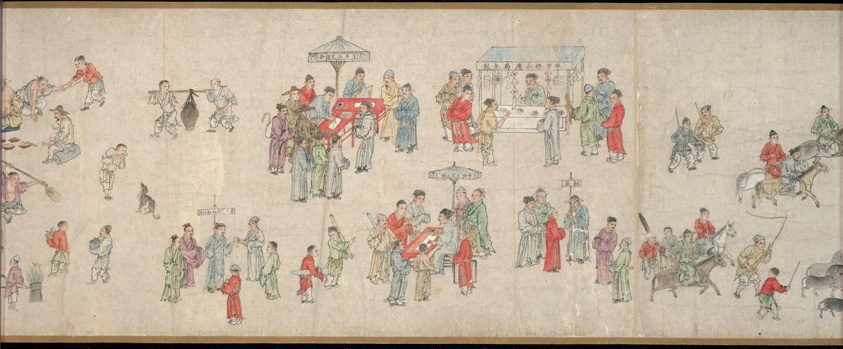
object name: Painting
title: Street Scenes in Times of Peace 太平風會圖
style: Chinese (culture or style)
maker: Zhu Yu (Zhu Junbi) 朱玉（朱君璧）; Chinese, 1293-1365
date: Yuan dynasty (1279–1368), 14th century 元朝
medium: Handscroll; ink and colors on paper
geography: China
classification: handscroll; painting; asian art